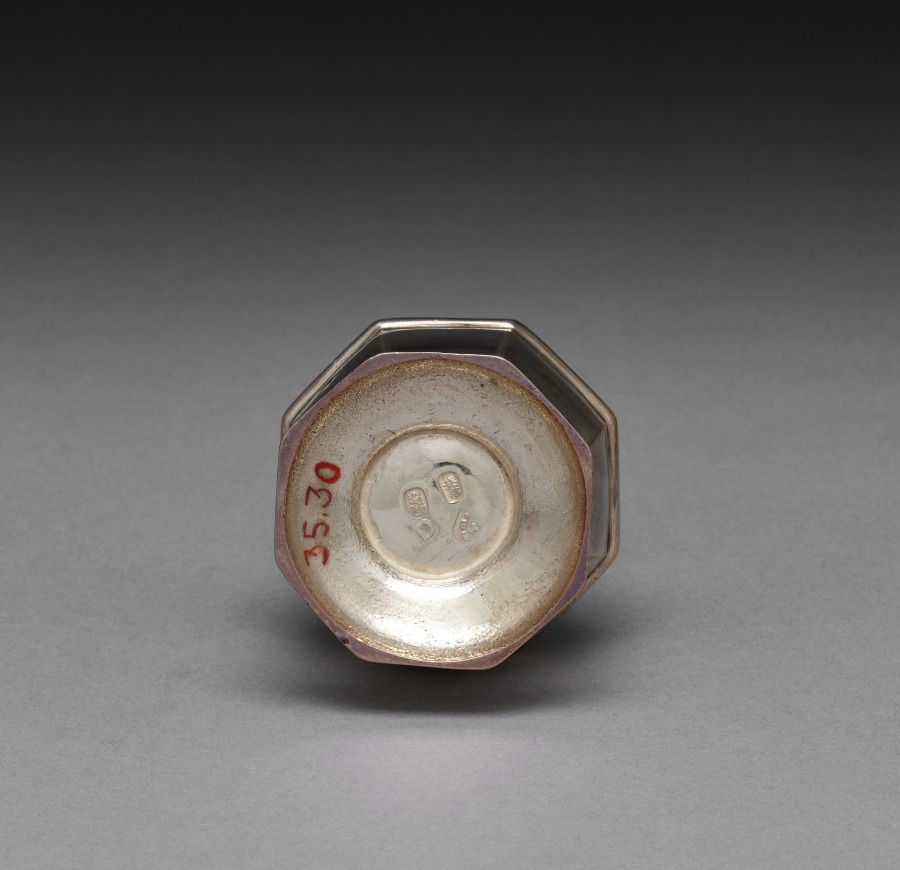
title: Caster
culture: England, London, 18th century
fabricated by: William Spackman (British)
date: 1719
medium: silver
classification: Silver